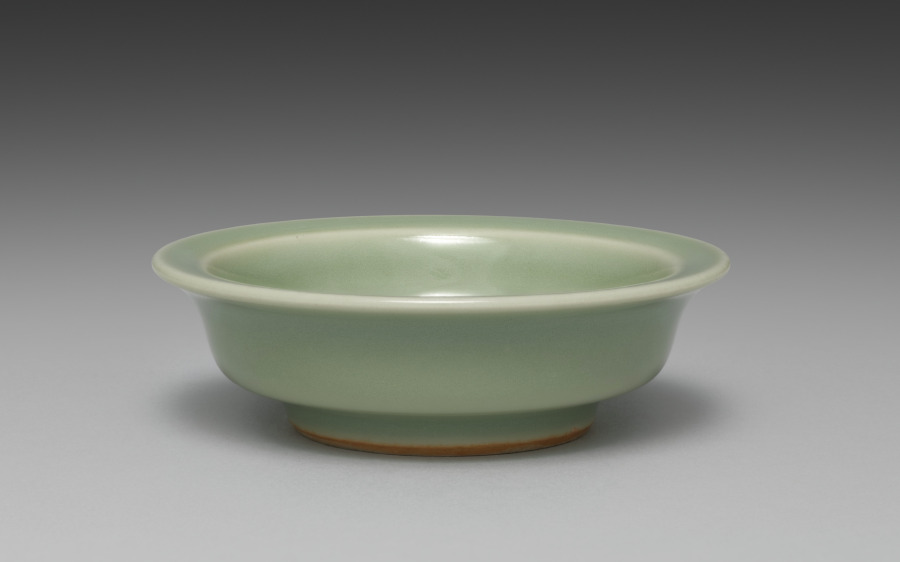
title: Saucer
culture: Japan, Meiji period (1868–1912)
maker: Seifū Yohei III (Japanese, 1851–1914)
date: 1893–1914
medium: One from a set of ten dishes; porcelain with green glaze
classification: Ceramic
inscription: 清風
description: Yohei III’s main output for his sophisticated clientele was in the form of tea sets and dining sets. He created a range of dishes in green glazes. He often produced in pairs, sets of five, or sets of ten. For this set of ten small dishes in a simple, round form that emphasizes the glaze above all, the box lid designates the piece as seiji, or green-glazed porcelain, using a general term for the extensive palette of green glazes often called celadon in English. The box lid further identifies the dishes themselves as tōchō, literally “bean-sized saucers,” a size that makes them suitable for dipping sauces.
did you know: The ten dishes in this set are stored in stacks of five in a two-compartment box.